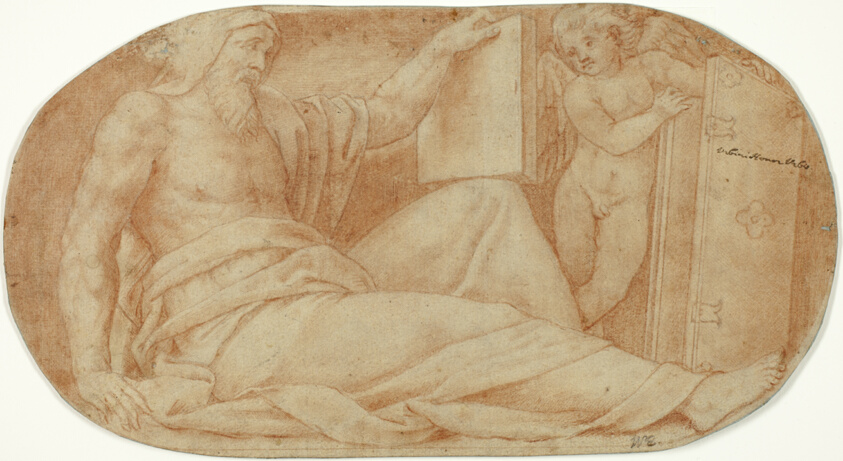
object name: Drawing and Watercolor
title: Moses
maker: Circle of Bernardino Gatti, called Il Sojaro; Italian, c. 1495-1575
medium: Red chalk over traces of black chalk, on oval-shaped ivory laid paper, laid down on blue laid paper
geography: Italy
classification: drawings (visual works); prints and drawing